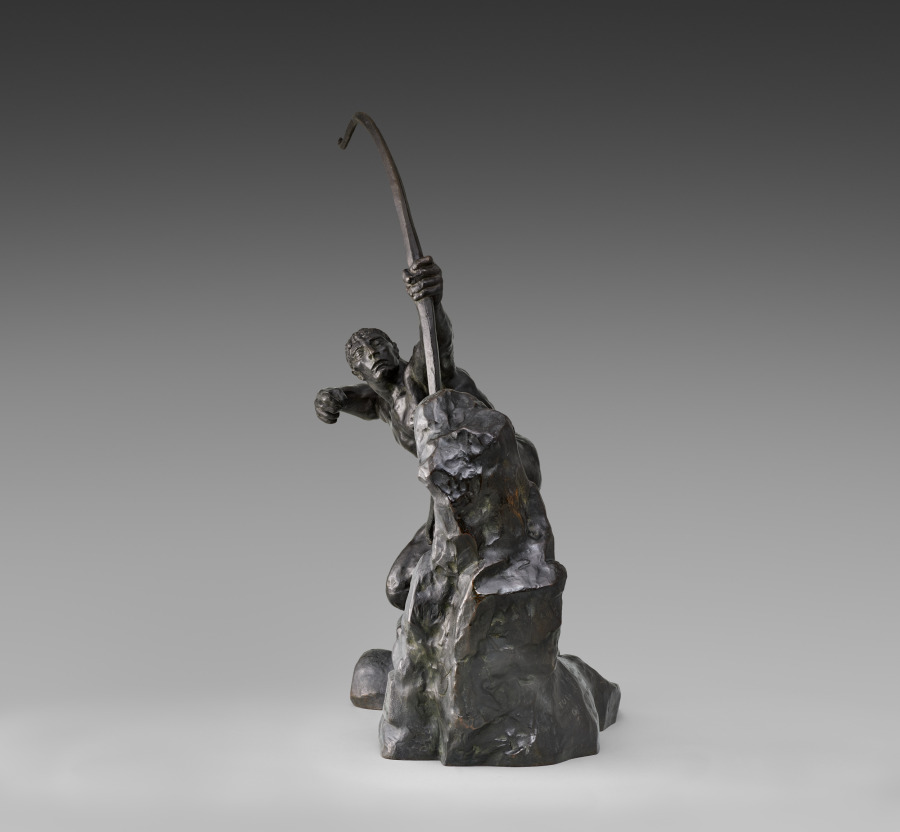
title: Herakles the Archer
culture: France, 19th century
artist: Emile Antoine Bourdelle (French, 1861–1929)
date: 1908–9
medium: bronze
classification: Sculpture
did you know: The model who posed for this sculpture was Major Paul Gustave André Doyen-Parigot, an accomplished sportsman and military commander, who was later killed during World War I in the Battle of Verdun.